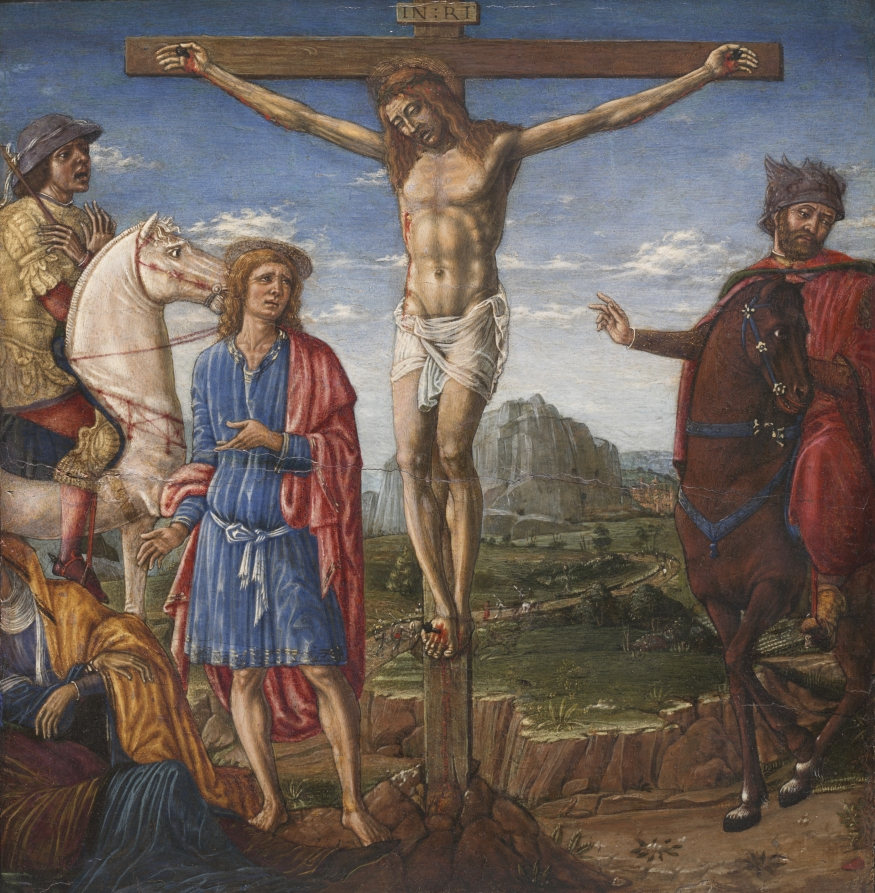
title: The Crucifixion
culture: Italy, Siena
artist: Matteo di Giovanni (Italian, c. 1435–1495)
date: 1470s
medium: tempera and oil with gold on wood panel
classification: Painting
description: This small picture belonged to a predella, a series of subsidiary panels consisting of narrative scenes and situated at the bottom of an altarpiece. Predella paintings are significant because the artist was allowed more freedom and inventiveness here than in the higher part of the altarpiece. In this Crucifixion scene, the harmony of colors, the monumentality of the figures, and the symmetry of the composition all reflect the classical spirit of Renaissance Italy. Moreover, the panel shows some characteristics of the traditional Sienese school—such as the quality and elegance of the lines—which persists in Giovanni’s works.